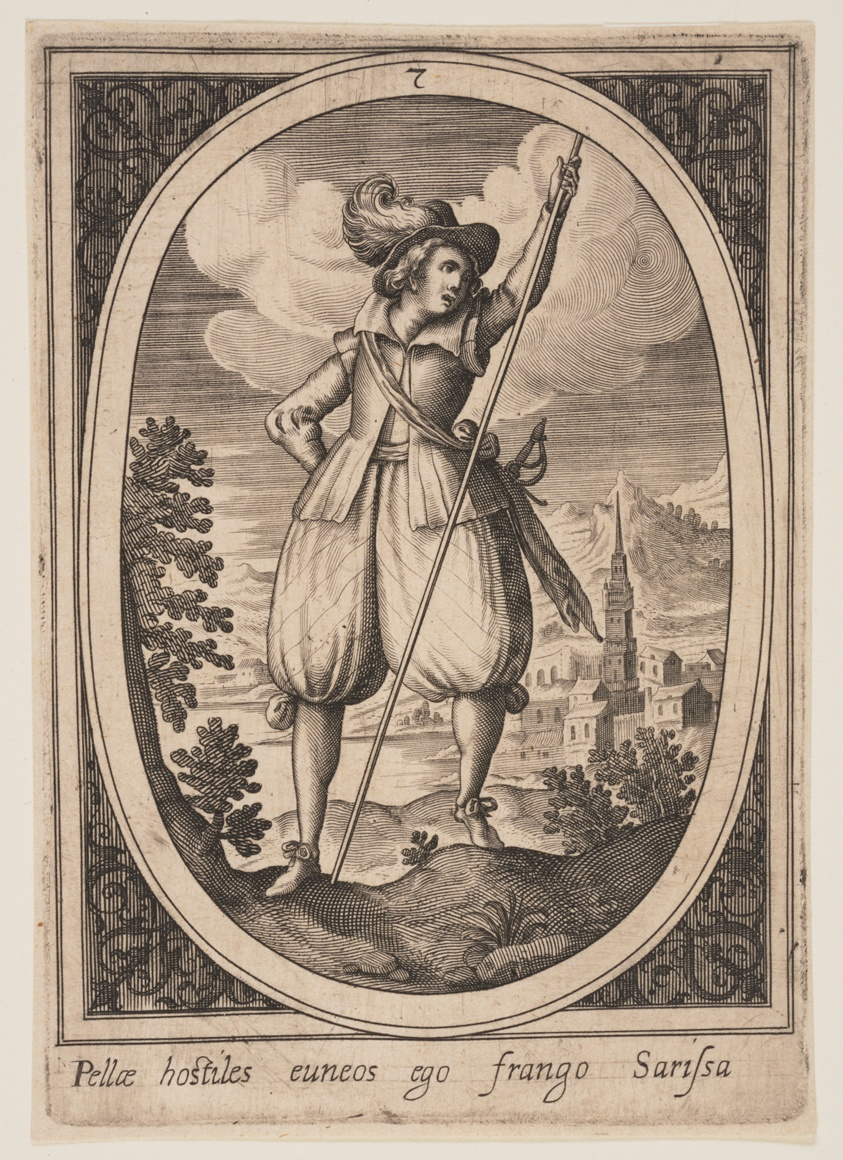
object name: Print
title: Plate 7 from Military Figures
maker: Attriuted to Heinrich Ulrich (German, c. 1572-1621); possibly after Paul Mair (German, active c. 1600)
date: c. 1590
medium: Engraving on ivory laid paper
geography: Germany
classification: engraving; paper; print; prints and drawing